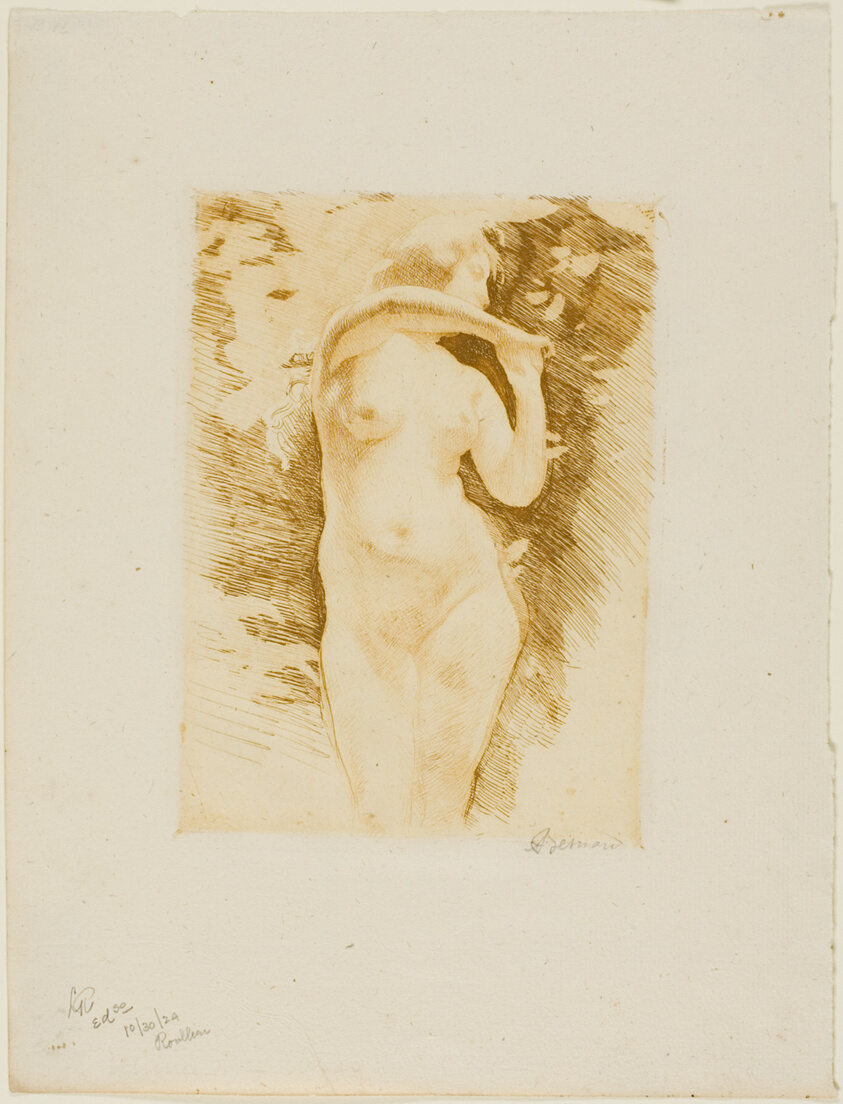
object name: Print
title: Eve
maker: Albert Besnard (French, 1849-1934)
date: 1896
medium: Etching and drypoint in bistre ink on ivory laid paper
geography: France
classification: etching; print; prints and drawing